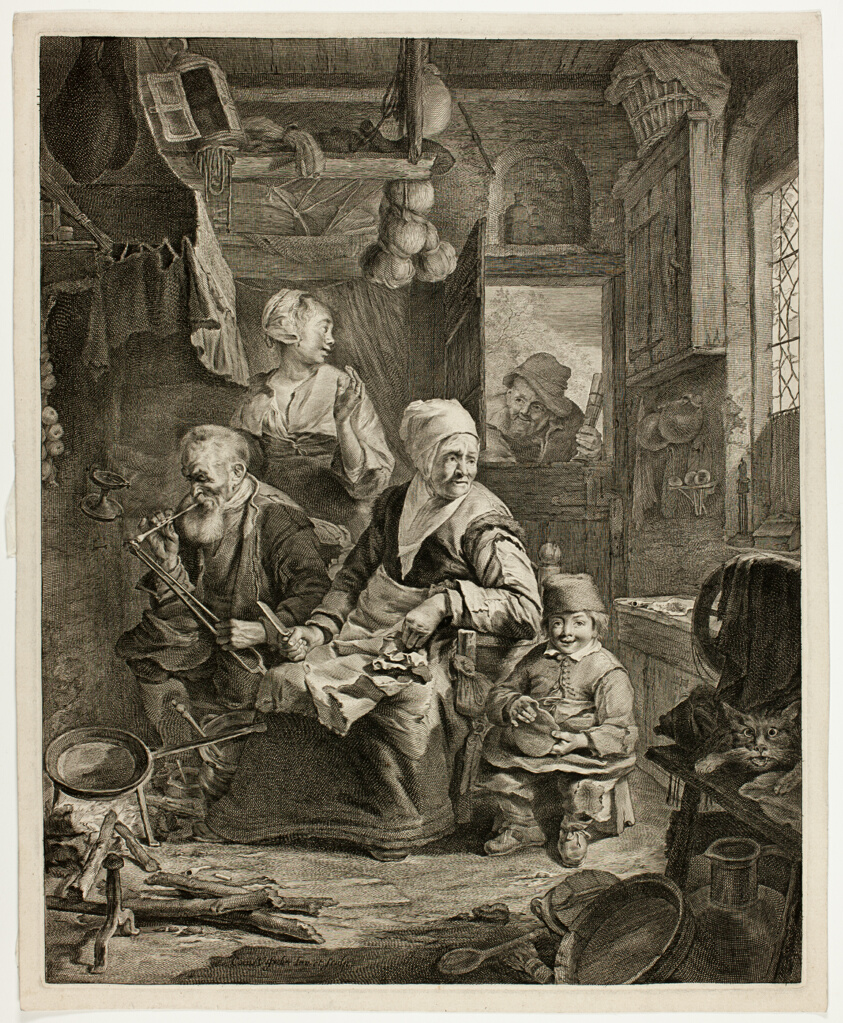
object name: Print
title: The Pancake Woman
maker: Cornelis Visscher (Dutch, c. 1629-1658)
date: c. 1649-58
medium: Etching and engraving on paper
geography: Holland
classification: engraving; print; prints and drawing